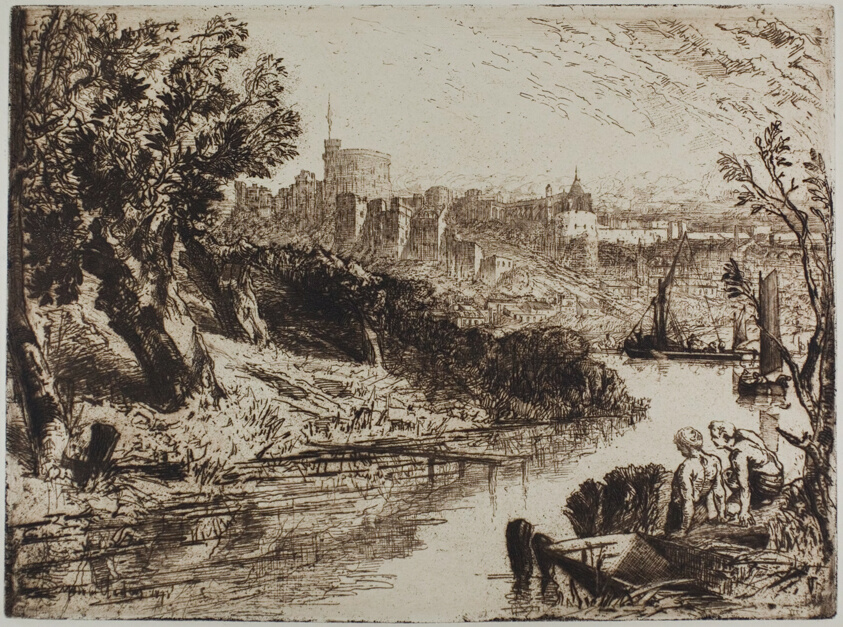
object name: Print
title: Windsor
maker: Francis Seymour Haden (English, 1818-1910)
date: 1878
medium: Etching on ivory wove paper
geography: England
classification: etching; print; prints and drawing